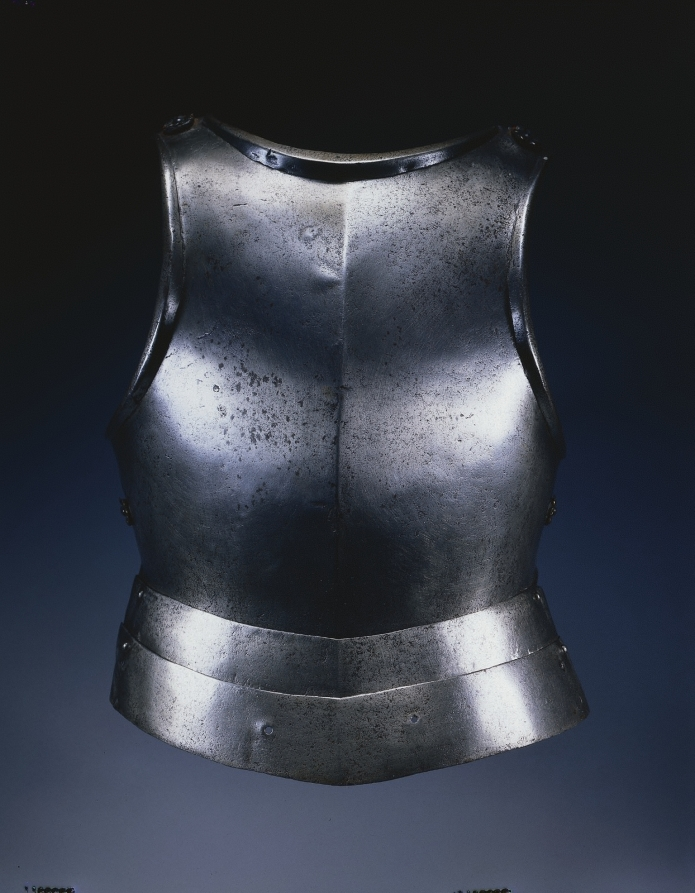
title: Gothic Breastplate and Taces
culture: North Italy, late 15th Century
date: c. 1475–1500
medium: steel with brass rosette rivets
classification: Arms and Armor